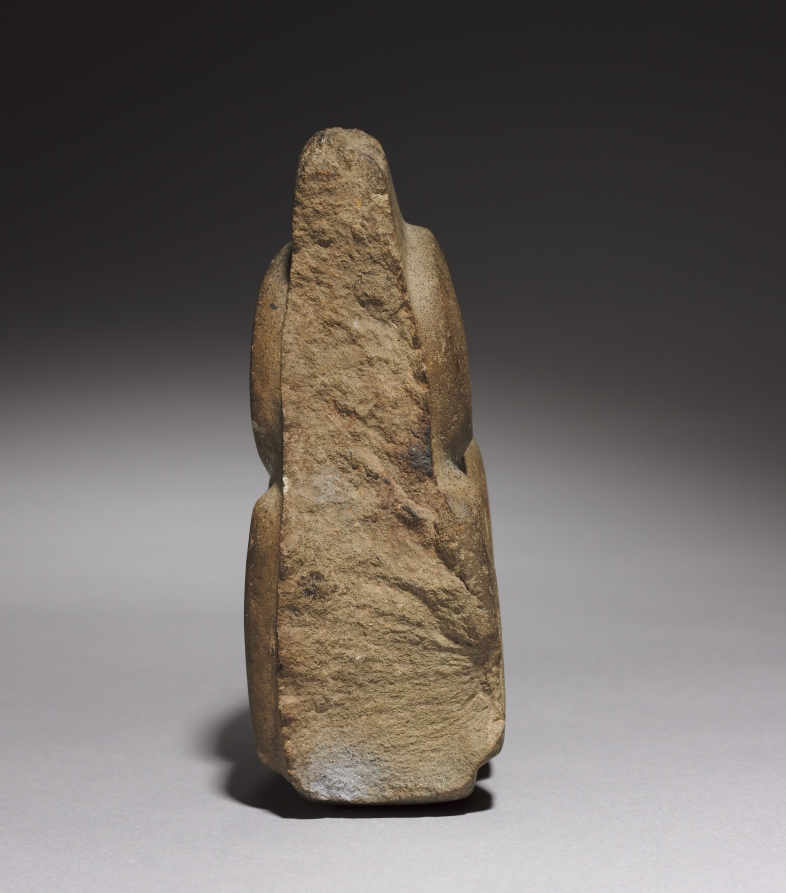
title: Head-Shaped Hacha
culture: Mexico, Isthmus of Tehuantepec(?), Coastal Lowlands style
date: 400–950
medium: stone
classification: Sculpture